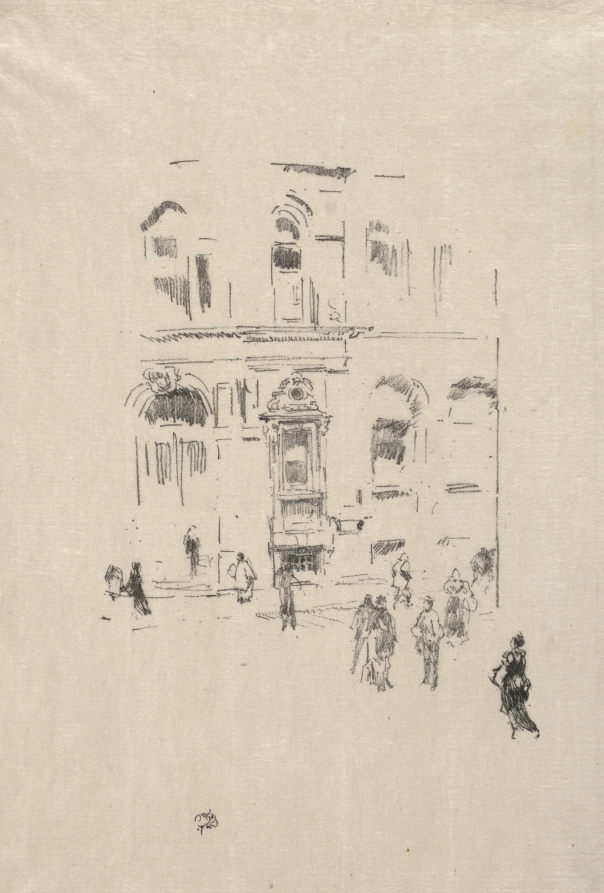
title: Victoria Club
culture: America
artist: James McNeill Whistler (American, 1834–1903)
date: 1879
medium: lithograph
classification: Print